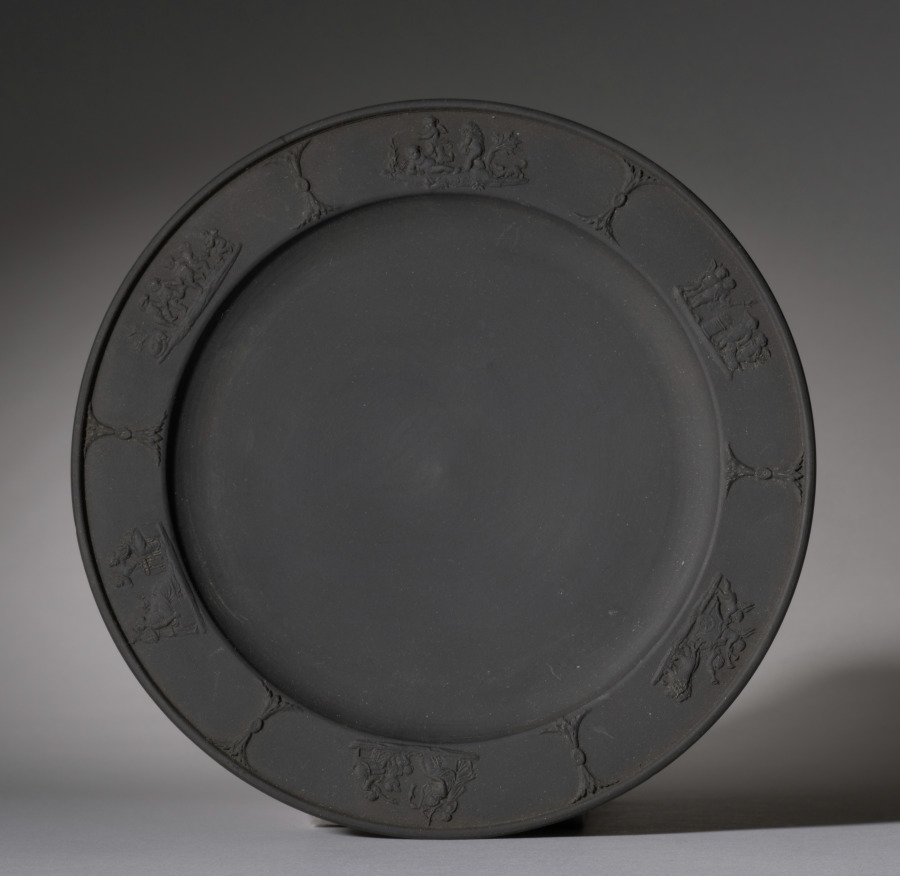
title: Small Plate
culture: England, Staffordshire, 19th century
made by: Wedgwood Factory (British)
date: 1800s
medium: black basalt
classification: Ceramic